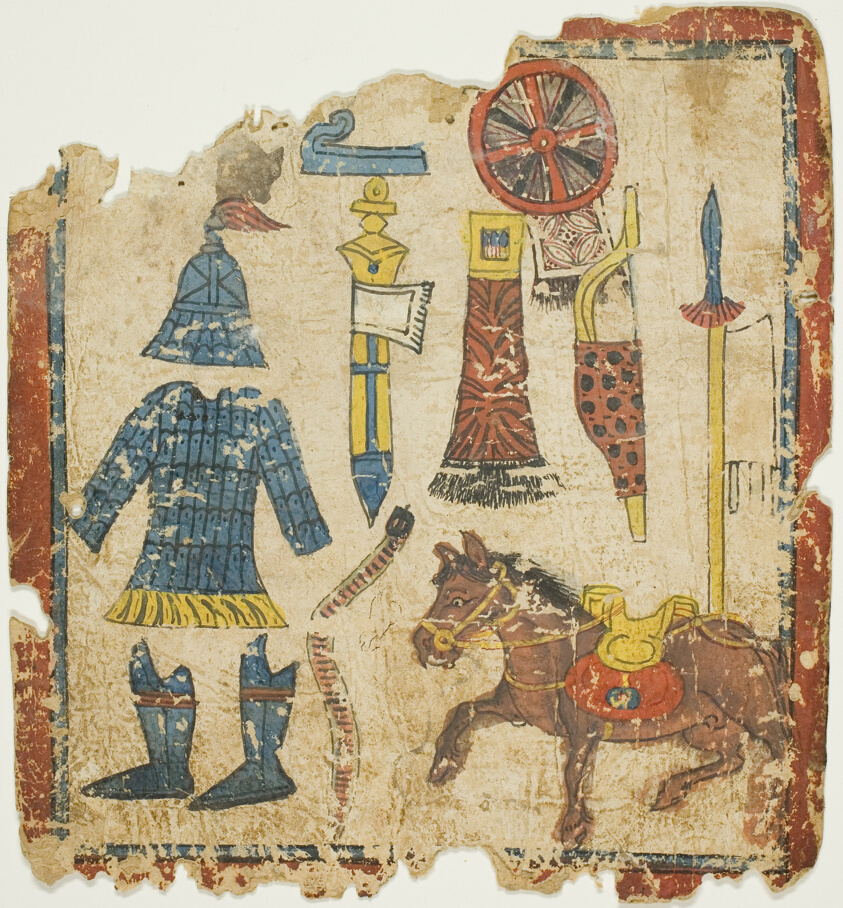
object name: Painting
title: Ritual Objects, from a Set of Initiation Cards (Tsakali)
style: Himalayan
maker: Southern Tibet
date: 14th/15th century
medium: Ink and watercolor on paper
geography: Tibet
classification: ink; painting